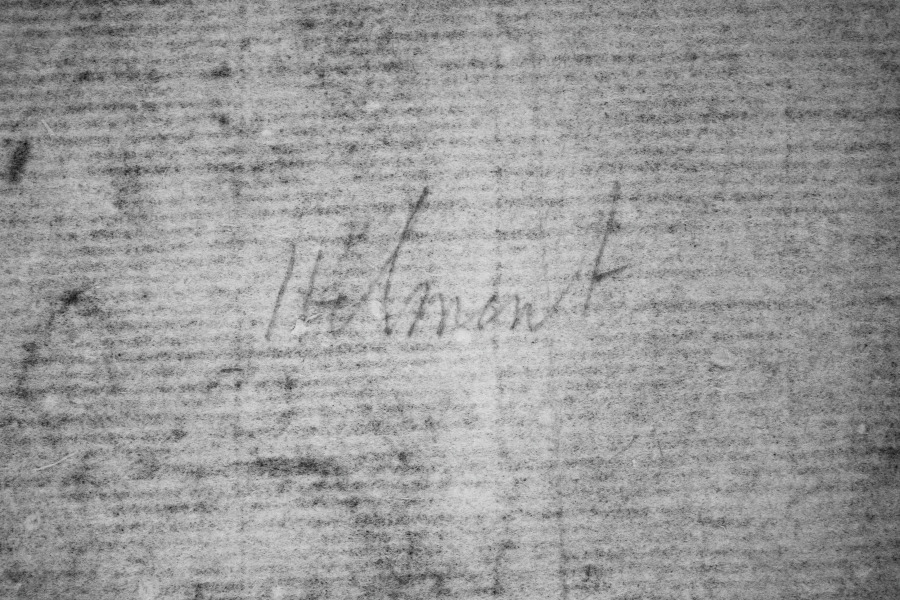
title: Studies of a Naked Seated Boy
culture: Netherlands, 16th - 17th century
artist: Jacob de Gheyn II (Netherlandish, 1565–1629)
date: c. 1603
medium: Black chalk and white chalks with stumping on gray-blue antique laid paper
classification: Drawing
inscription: in graphite, verso: “24” and “376/” and “Helmont”?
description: This sheet of studies of a young male model drawn from various angles is among the earliest nudes drawn from life in the Netherlands. The artist Jacques de Gheyn carefully observed the boy’s body and poses, concentrating on the modeling of his skin and muscles through light and shadow rendered with a combination of black and white chalks on gray-blue paper. The directness of this study was unusual in the Northern Netherlands around 1600, where the vogue for mythological scenes inspired human bodies that were more artificial than natural.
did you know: This sheet of studies of a young male model drawn from various angles is among the earliest nudes drawn from life in the Netherlands.